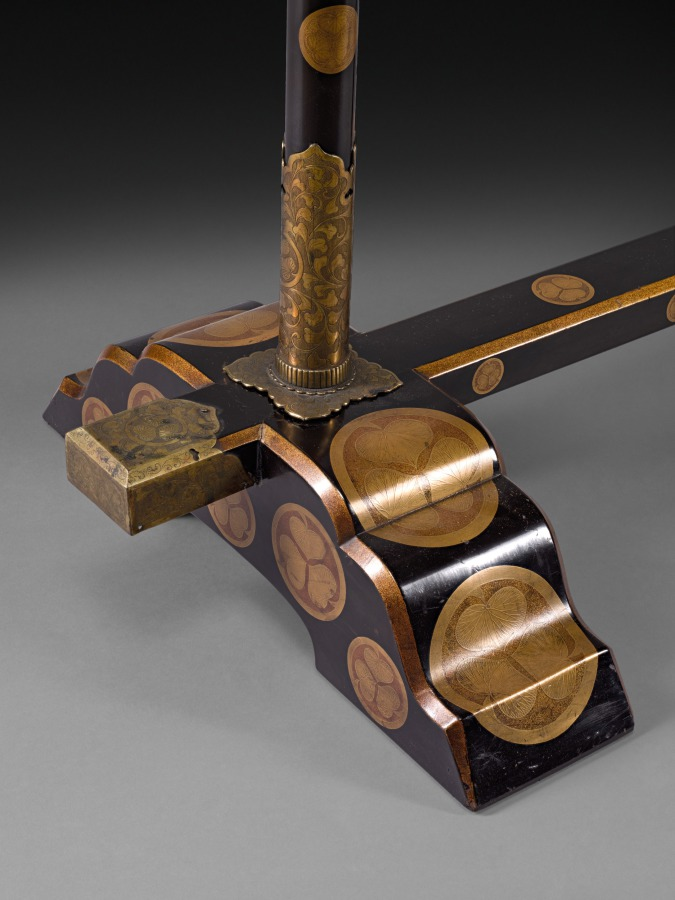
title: Rack for Noh Robe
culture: Japan, Edo period (1615–1868)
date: 1615–1868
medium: lacquer on wood with metal fittings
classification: Lacquer